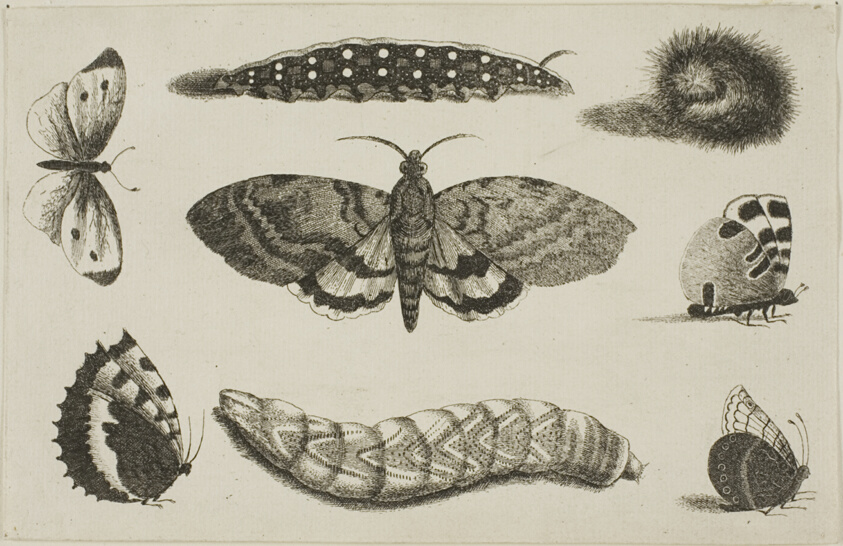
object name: Print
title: Three Caterpillars, a Moth, and Four Butterflies, from Diversae Insectorum...Figurae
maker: Wenceslaus Hollar (Bohemian, 1607-1677)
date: after 1644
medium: Etching on ivory laid paper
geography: Bohemia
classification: etching; print; prints and drawing